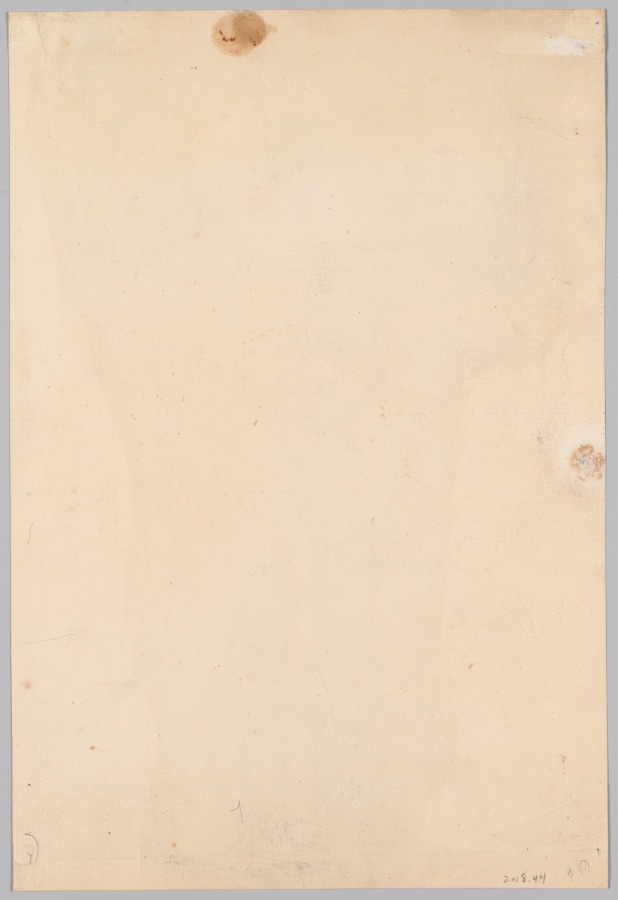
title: Nude Study of an Old Man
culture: France, 19th century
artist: Henri Lehmann (French, 1814–1882)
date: before 1852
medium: Graphite and stumping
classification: Drawing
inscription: lower right, in graphite: 8 May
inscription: verso: lower right corner, in graphite: #19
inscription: lower left corner: Henri Lehmann (L.1664g)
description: In preparation for executing largescale paintings, artists often produced studies of individual components of their compositions in order to work through their ideas. Lehmann made this figural study for a mural in the old Hôtel de Ville in Paris, destroyed by fire during the Commune in 1871. Here, the artist explored how to render deep shadows on the nude male body.